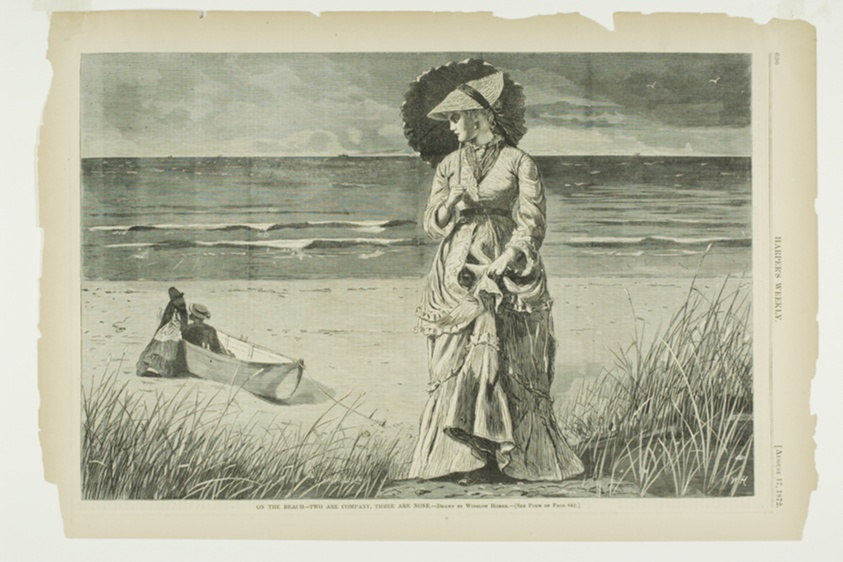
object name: Print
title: On the Beach—Two Are Company, Three Are None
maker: Winslow Homer (American, 1836-1910); published by Harper's Weekly (American, 1857-1916)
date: published August 17, 1872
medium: Wood engraving on paper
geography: United States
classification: wood engraving; print; prints and drawing